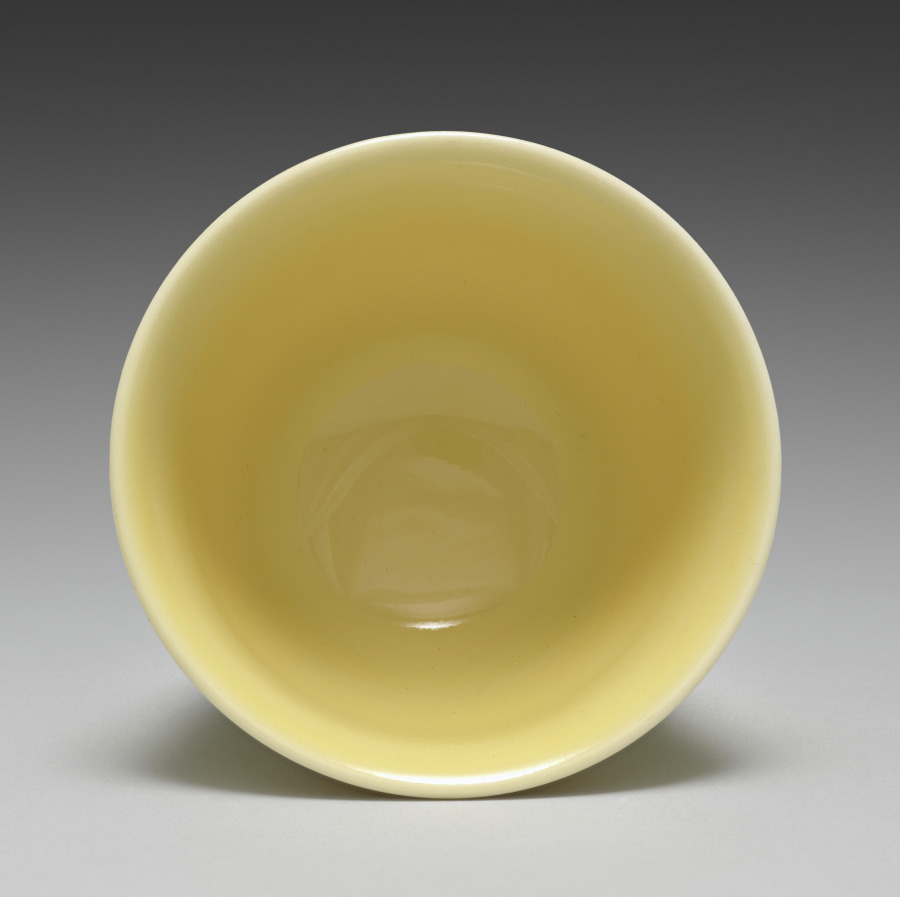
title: Cup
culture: Japan, Taishō period (1912–26) or Shōwa period (1926–89)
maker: Seifū Yohei IV (Japanese, 1872–1951)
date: 1914–46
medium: porcelain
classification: Ceramic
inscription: 清風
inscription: 清風造 【印】成山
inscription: 清風盧人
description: Like his father, Yohei IV also produced works with red or yellow monochrome glazes. His yellow-glazed works include this set of five drinking cups, a pair of sake pourers CMA 2022.216, and a sweets bowl molded into the shape of a chrysanthemum CMA 2022.218.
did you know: Seifū Yohei IV learned the ceramics industry from his father and painting from Tanomura Shosai.